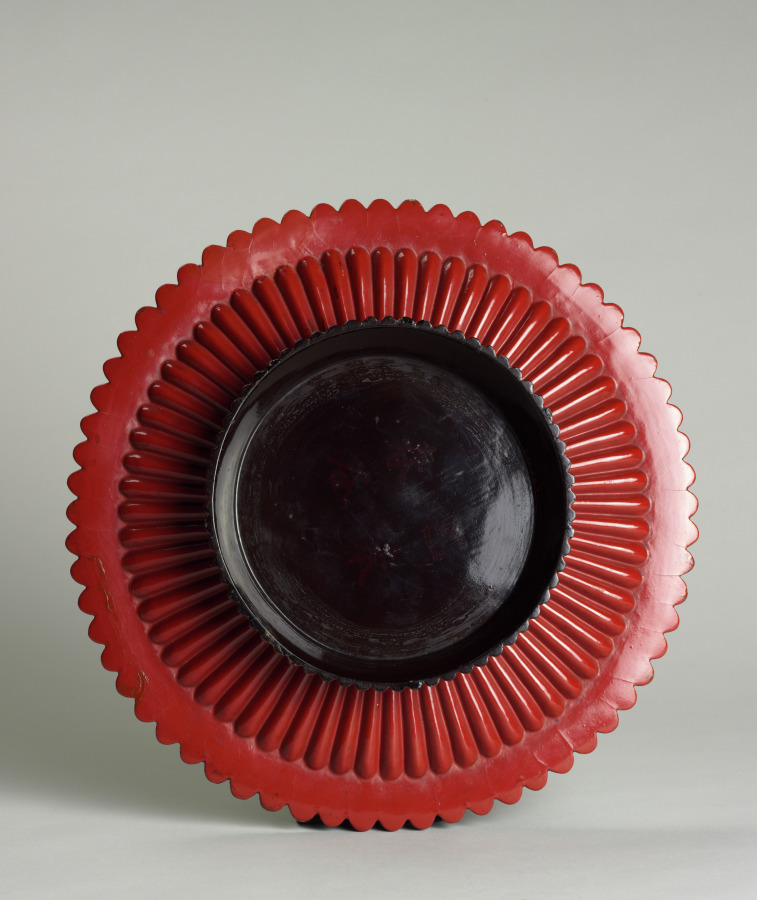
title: Fluted Tray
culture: China, Yuan dynasty (1271-1368) - Ming dynasty (1368-1644)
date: 1300s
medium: red lacquer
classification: Lacquer